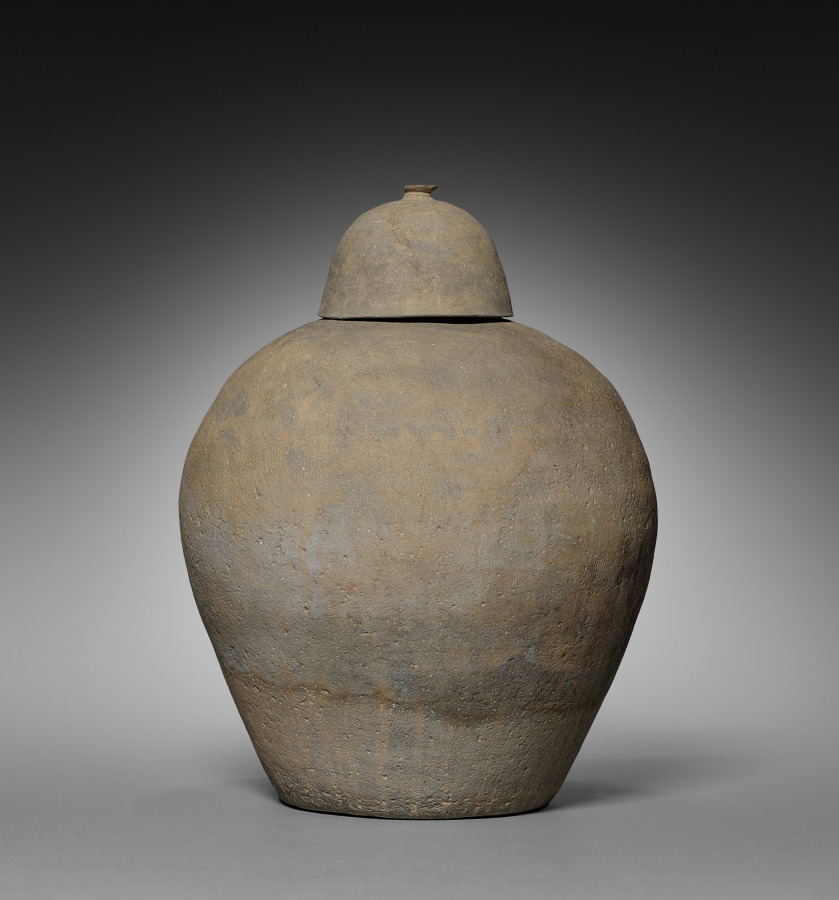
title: Burial Urn with Cover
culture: Korea, Three Kingdoms period (57 BCE–668 CE)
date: 300s–500s CE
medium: earthenware with impressed design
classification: Ceramic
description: Produced in closed kilns built on hillsides during the Three Kingdoms period, this lidded jar once contained the cremated remains of the dead. This type of burial jar became widespread after the introduction of Buddhism, as cremation became a common practice in Korea.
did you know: Closed kilns built on hillsides became widely used for producing this type of pottery vessel in Korea during the Three Kingdoms period.